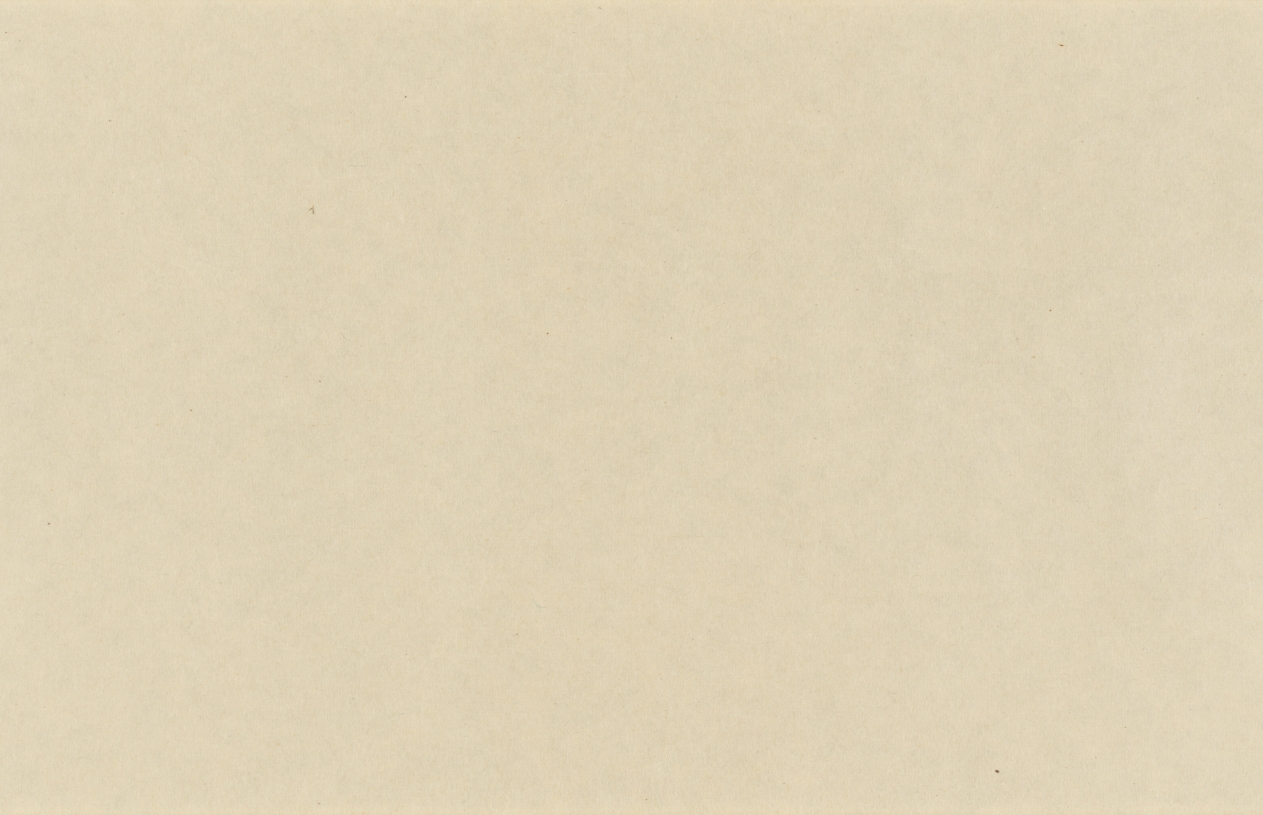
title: Eight Views of Xiao-Xiang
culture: Japan, Muromachi period (1392–1573)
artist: Sesson Shūkei (Japanese, c. 1492–c. 1577)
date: 1500s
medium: handscroll; ink on paper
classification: Painting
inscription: Signature and seal of artist at end of painting.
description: Eight Views of the Xiao and Xiang Rivers can be traced to 11th-century Chinese poems and paintings, the depiction of which had also become popular among Korean and Japanese painters. Xiao-Xiang refers to the region in present-day Hunan province where the Xiao and Xiang rivers converge. Few painters of the Eight Views had in fact seen the scenery; rather, they were trying to portray in ink and wash the lyrical qualities of dim light and a misty atmosphere typical of that region. Each of the poetic titles suggests a time of day, a season, or specific atmospheric conditions—subjects that challenged the abilities of the most talented artists. In this miniature painting (shukuzu) of the Muromachi period, Japanese Zen monk and painter Shukei Sesson depicted all eight views featured in Chinese prototypes: Wild Geese Descending to Sandbar; Returning Sails Off a Distant Coast; Mountain Market in Clearing Mist; River and Sky in Evening Snow; Autumn Moon over Dongting Lake; Night Rain on the Xiao and Xiang; Evening Bell from Mist-Shrouded Temple; and Fishing Village in Evening Glow.